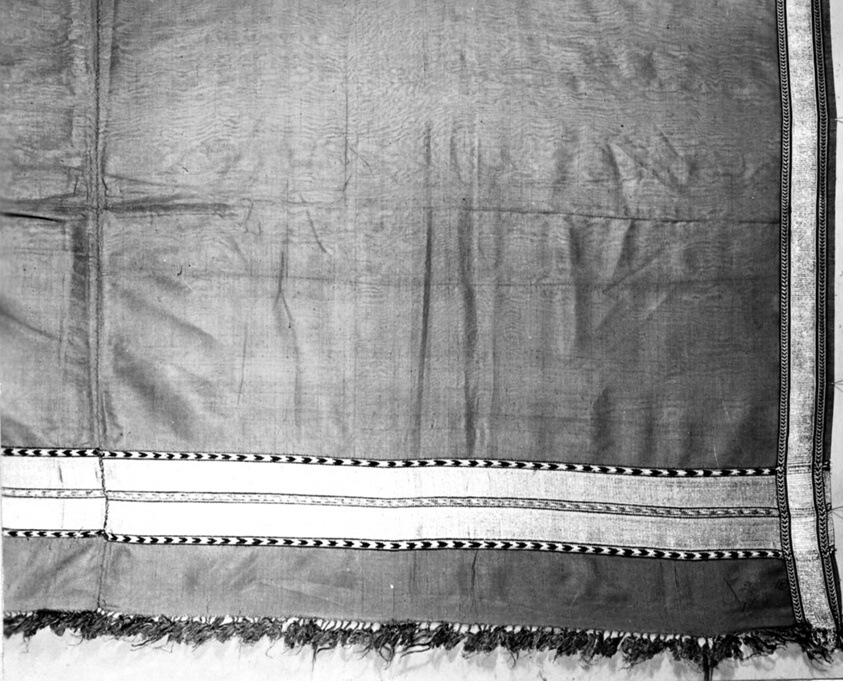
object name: Costume and Accessories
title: Sash or Sarong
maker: Indonesia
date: 19th century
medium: Plain cloth with borders in compound twill and cloth; red silk with woven gold and colored silk borders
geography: Indonesia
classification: textile; weaving; costume; dress (garment); clothing